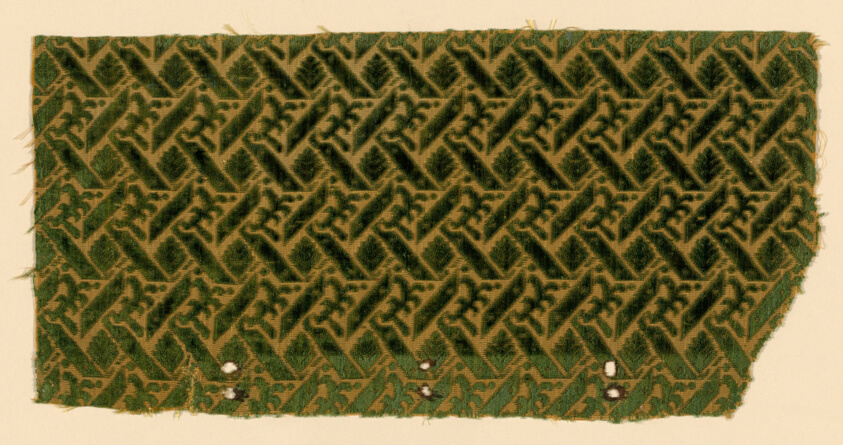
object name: Textile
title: Fragment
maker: Italy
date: 1601/35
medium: Silk, plain weave with supplementary pile warps forming cut, uncut, and voided velvet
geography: Italy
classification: textile; weaving - velvet; weaving